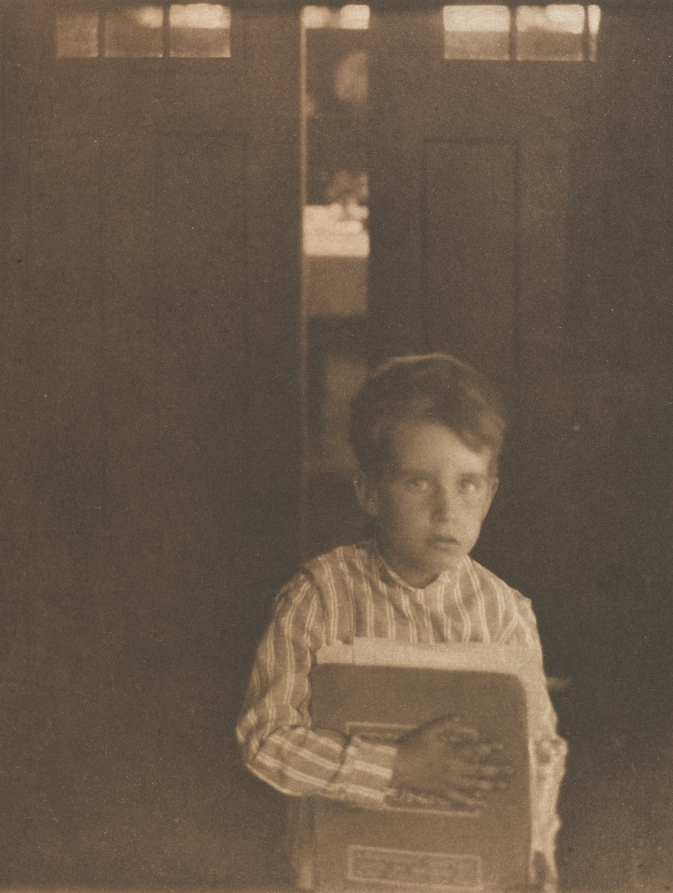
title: Camera Work: Boy with Camera Work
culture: America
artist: Clarence H. White (American, 1871–1925)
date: 1905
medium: photogravure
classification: Bound Volume